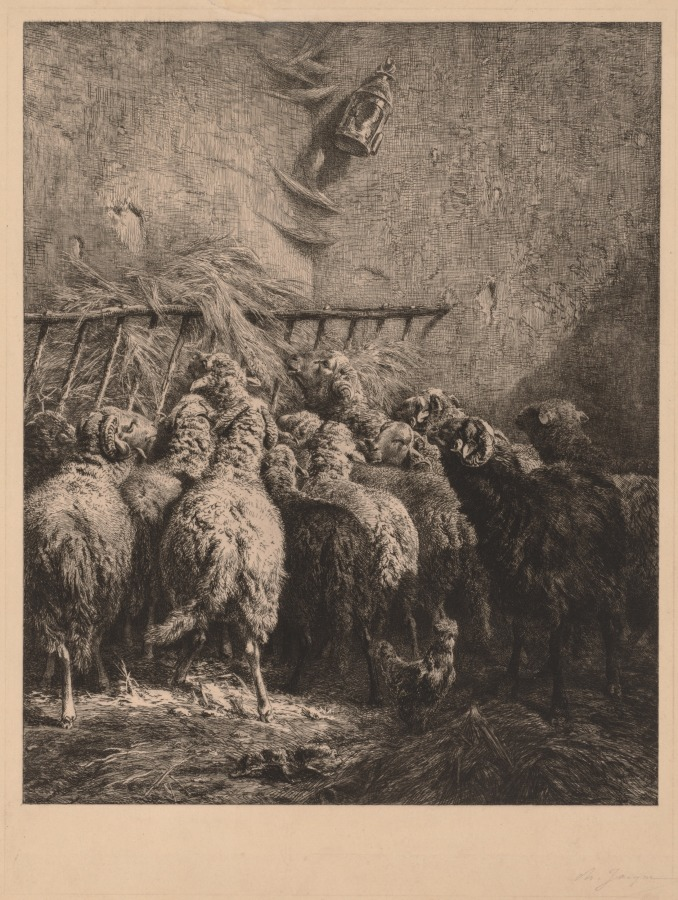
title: Sheep Enclosure in Béarn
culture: France, 19th century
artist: Charles-Émile Jacque (French, 1813–1894)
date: c. 1889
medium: etching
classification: Print